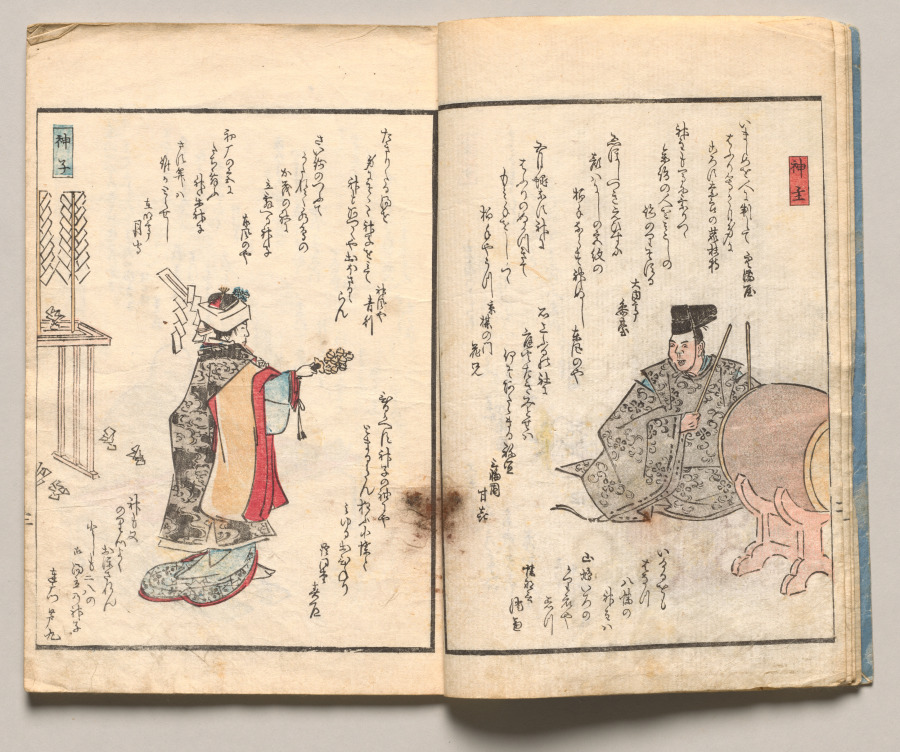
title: Spread Four from Volume One of People of Japan in Light Verse (Kyōka)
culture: Japan, Edo period (1615–1868)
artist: Utagawa Hiroshige (Japanese, 1797–1858)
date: 1857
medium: Woodblock-printed book; ink and color on paper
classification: Bound Volume